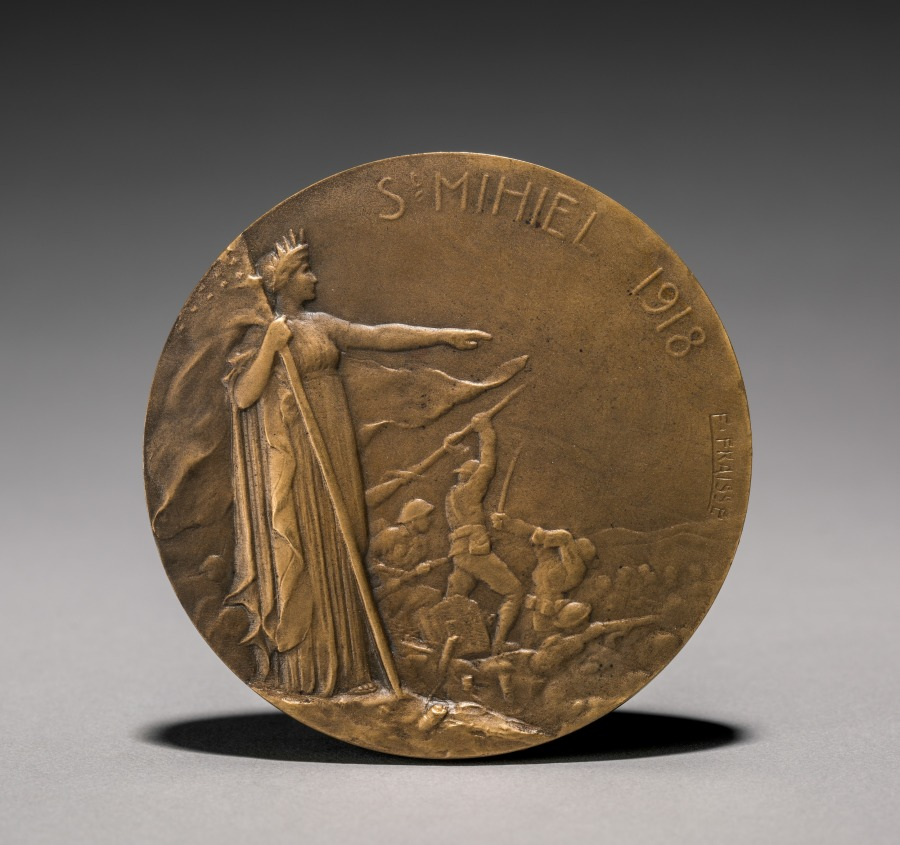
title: Medal (obverse)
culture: France, 20th century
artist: Edouard Fraisse (French, 1880–1945)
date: 1900s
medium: bronze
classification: Metalwork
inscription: "St. Mihiel 1918."